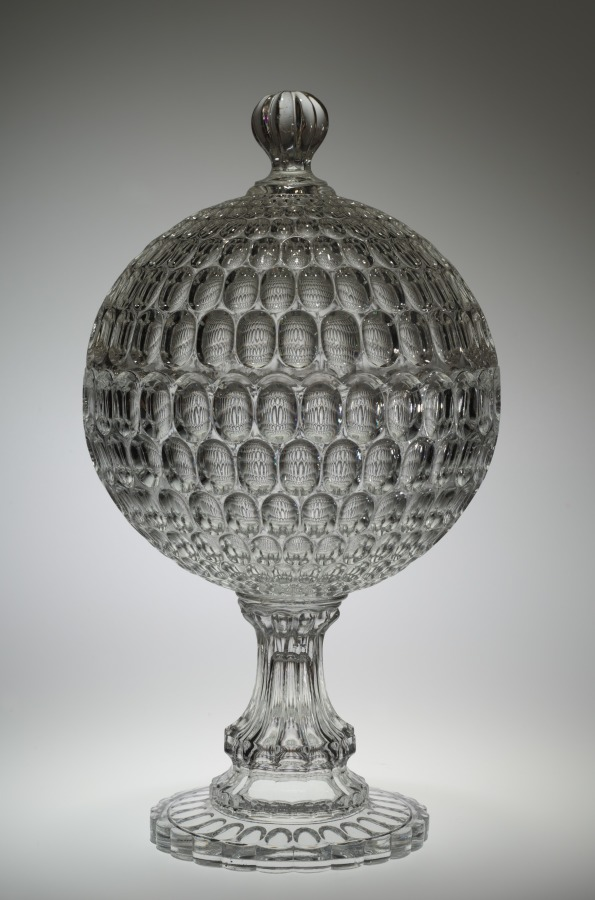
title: Argus Covered Compote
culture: America, Pennsylvania, Pittsburgh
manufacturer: Bakewell, Pears and Company (American)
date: 1850–70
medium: glass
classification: Glass